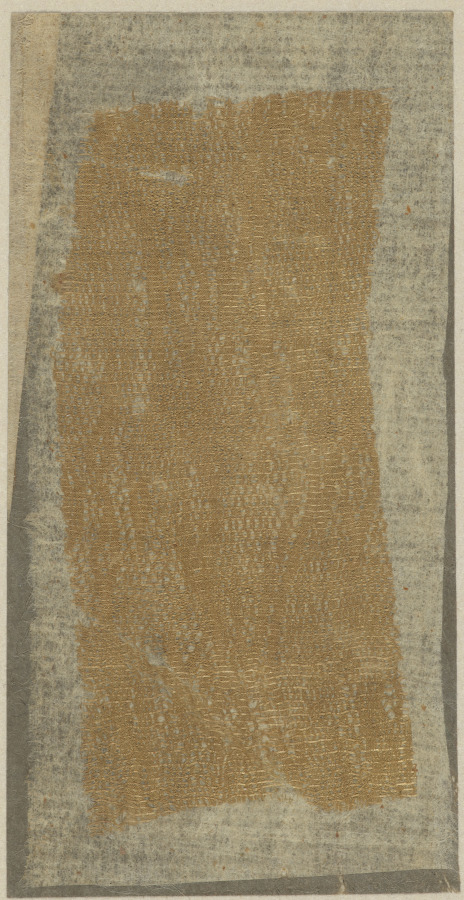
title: Two Fragments Mounted as One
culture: China, Tang dynasty (618–907) or Japan, Nara period (710–794)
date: 700s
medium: silk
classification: Textile